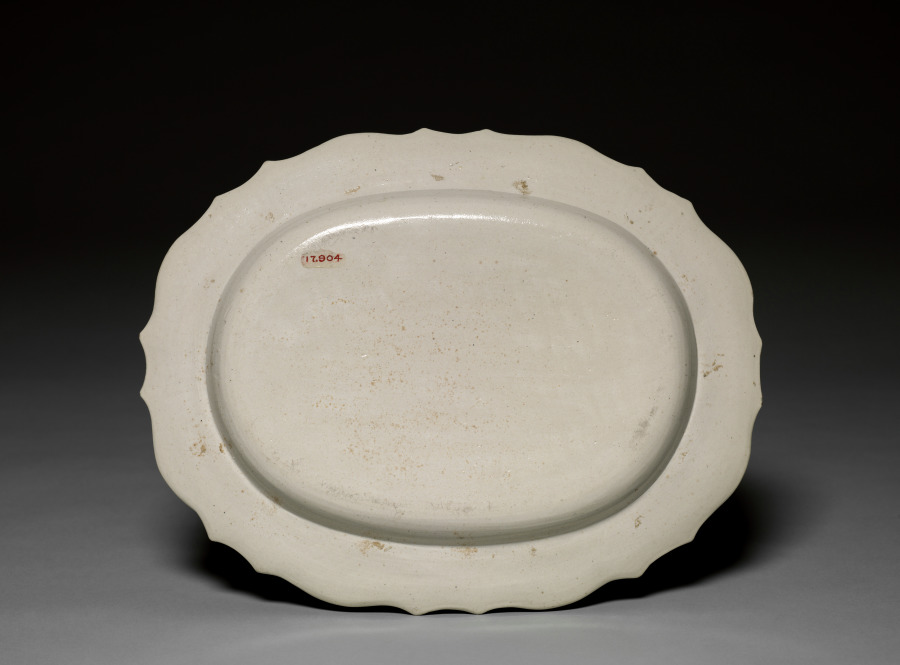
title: Platter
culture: England, Staffordshire, 18th century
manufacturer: Staffordshire Factory (British)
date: mid-1700s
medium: salt-glazed stoneware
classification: Ceramic